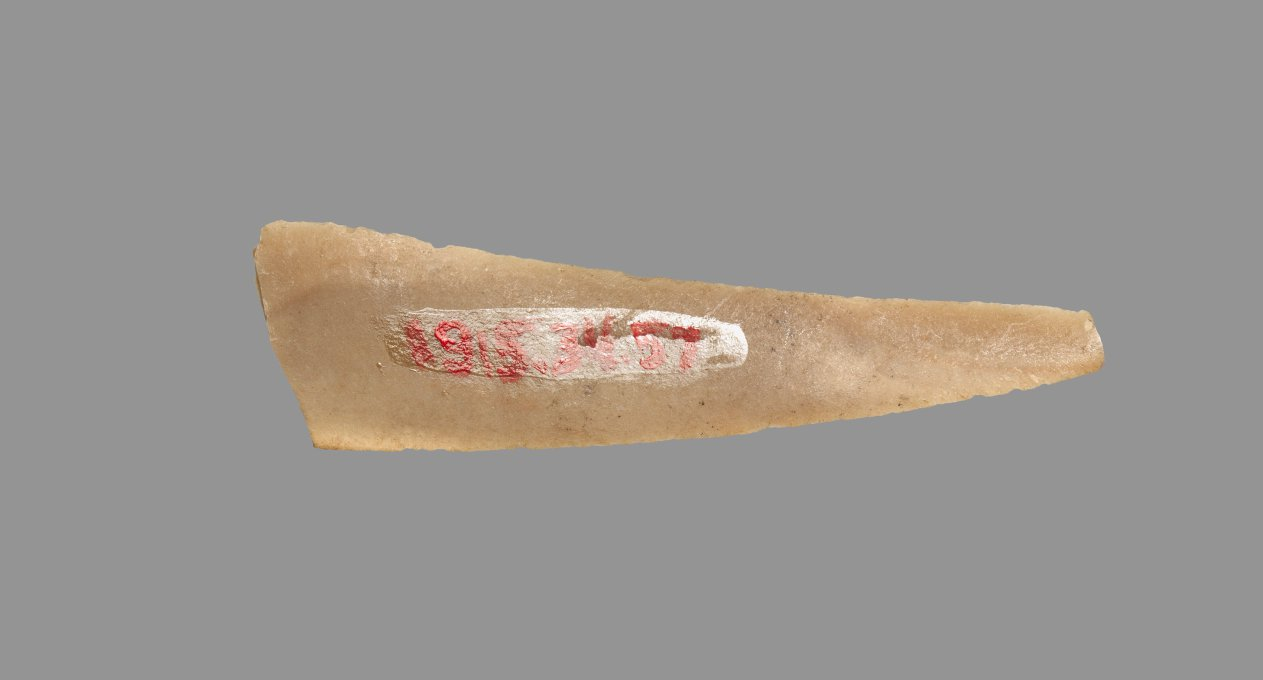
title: Sickle Blade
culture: Egypt, Middle Kingdom (2040–1648 BCE), Dynasty 12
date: 1980–1801 BCE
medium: flint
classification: Implements